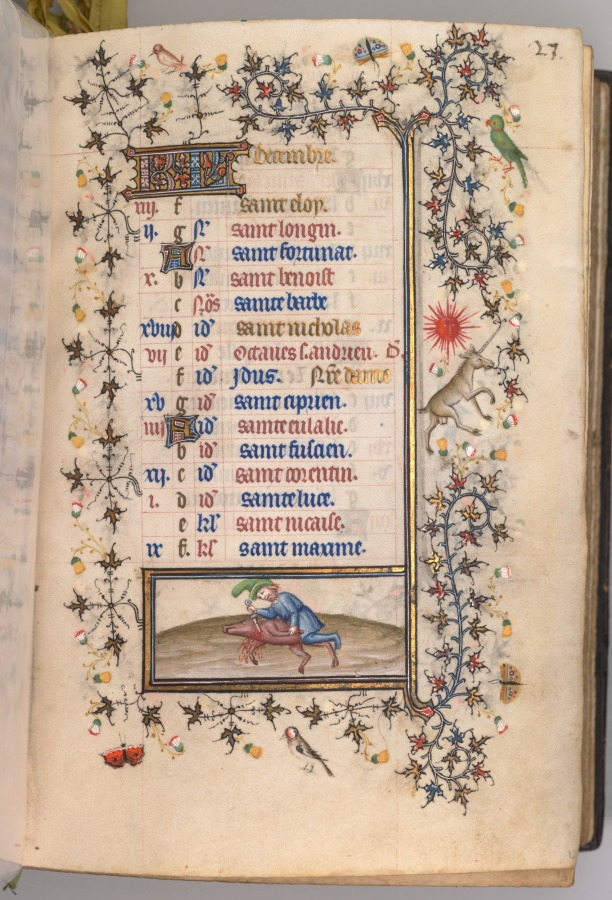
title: Hours of Charles the Noble, King of Navarre (1361-1425): fol. 12r, December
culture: France, Paris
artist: Master of the Brussels Initials and Associates (French)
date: c. 1405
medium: ink, tempera, and gold on vellum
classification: Bound Volume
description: This precious volume was obviously highly prized by its owner, the French-born King of Navarre, who had his coat of arms painted on no less than twenty folios. Rather than directly commissioning this manuscript from a specific workshop, it seems that Charles the Noble acquired his book of hours -- perhaps ready-made for the luxury market -- while on a trip to Paris in 1404-05. A collaborative effort, six painting styles are evidenced within the pages of this codex, those of two Italians, two Frenchmen, and two Netherlanders. The painter who was responsible for the planning and decoration of the book, and who produced seventeen of the large miniatures, was a Bolognese artist known as the Master of the Brussels Initials. His principal assistant, responsible for most of the borders, was a Florentine who signed his name "Zecho" da Firenze on folio 208 verso.